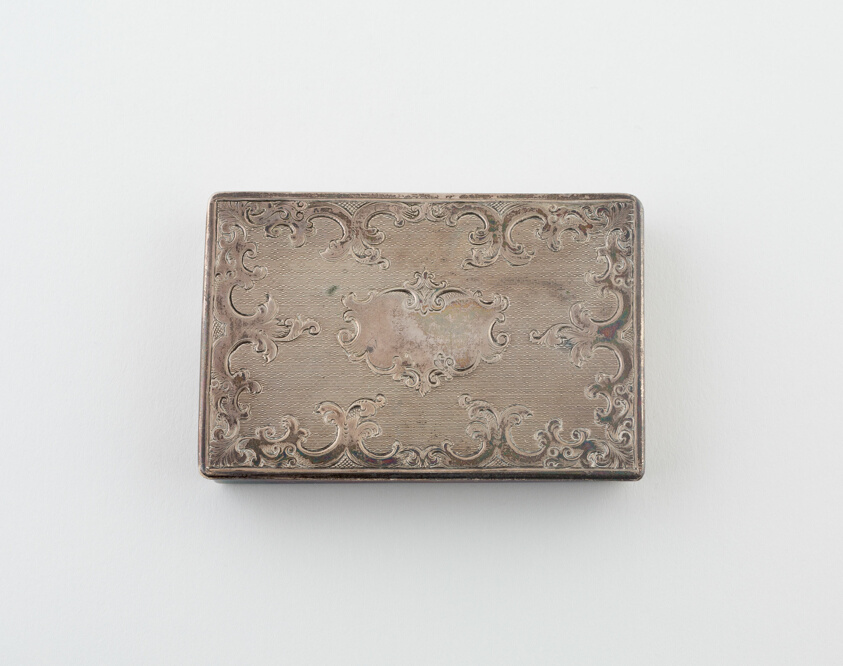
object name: Metalwork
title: Traveling Writing Set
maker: Possibly England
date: c. 1860/70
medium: Silver plate and wax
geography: England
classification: writing equipment; european decorative arts; metalwork; silver; decorative object/ornament